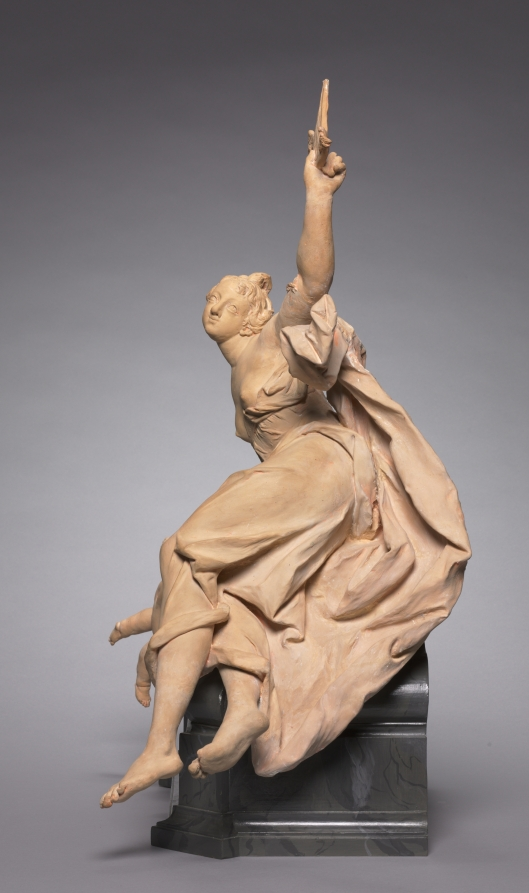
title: Abundance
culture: Austria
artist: attributed to Lorenzo Matielli (Austrian, c. 1688–1748)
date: c. 1730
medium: terracotta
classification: Sculpture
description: This work is probably a model for a garden statue that came from Castle Neuwartenburg near Vocklabruck. Castle Neuwartenburg was built from plans by Domenico Martinelli, with frescoes by Altomonte and sculpted decorations of the doorway and gardens by Lorenzo Matiellli (who also designed the door figures of the Cloisters at Melk and St. Michael's church in Vienna). The completion and dedication of the castle took place in 1732 with a personal visit by Emperor Karl VI. The statue was never executed, and the model remained in the castle.